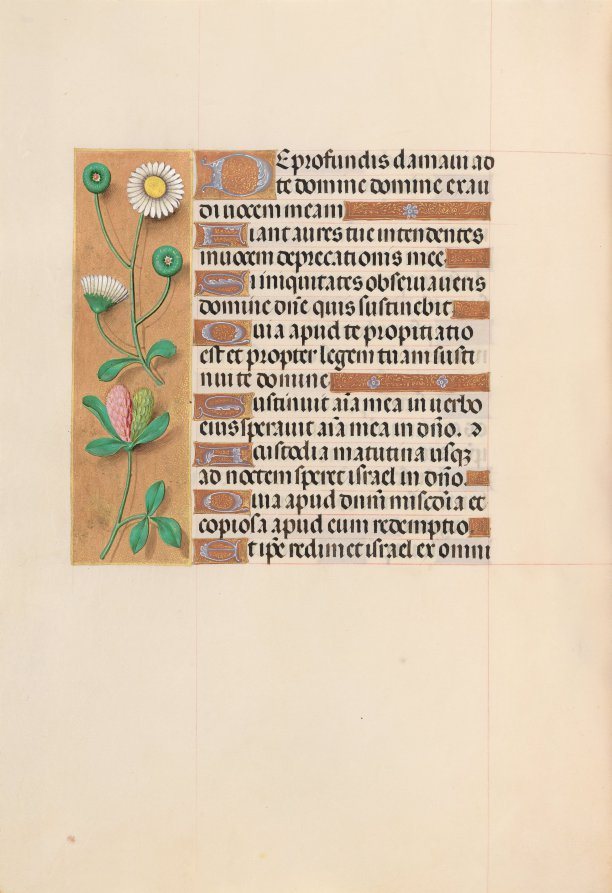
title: Hours of Queen Isabella the Catholic, Queen of Spain: Fol. 208v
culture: Flanders, Ghent and Bruges, late 15th century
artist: Master of the First Prayerbook of Maximillian (Flemish, c. 1444–1519)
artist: and Associates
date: c. 1500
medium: ink, tempera, and gold on vellum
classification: Bound Volume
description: This manuscript was illuminated by a circle of at least five highly organized manuscript painters active in the Flemish cities of Ghent and Bruges. The principal illuminator was Alexander Bening, who painted the majority of the book's miniatures. Manuscripts produced by this circle of artists are renowned for the decoration of their borders, which typically feature a rich variety of realistically-painted flowers, birds, and butterflies. This prayer book, called a book of hours, was intended not for a cleric, but for the private devotions of a lay person-in this case, Isabella the Catholic, Queen of Spain (1451-1504). Isabella's coat of arms embellishes the book's frontispiece. It is unlikely that the book was commissioned by the Queen herself; rather, she probably received it as a diplomatic gift from someone courting her patronage, perhaps Cardinal Francisco Jimenez de Cisneros. A Franciscan friar, Jimenez was dependent upon Isabella for his advancement, first to the post of Queen's confessor in 1492, and then to Archbishop of Toledo in 1495.